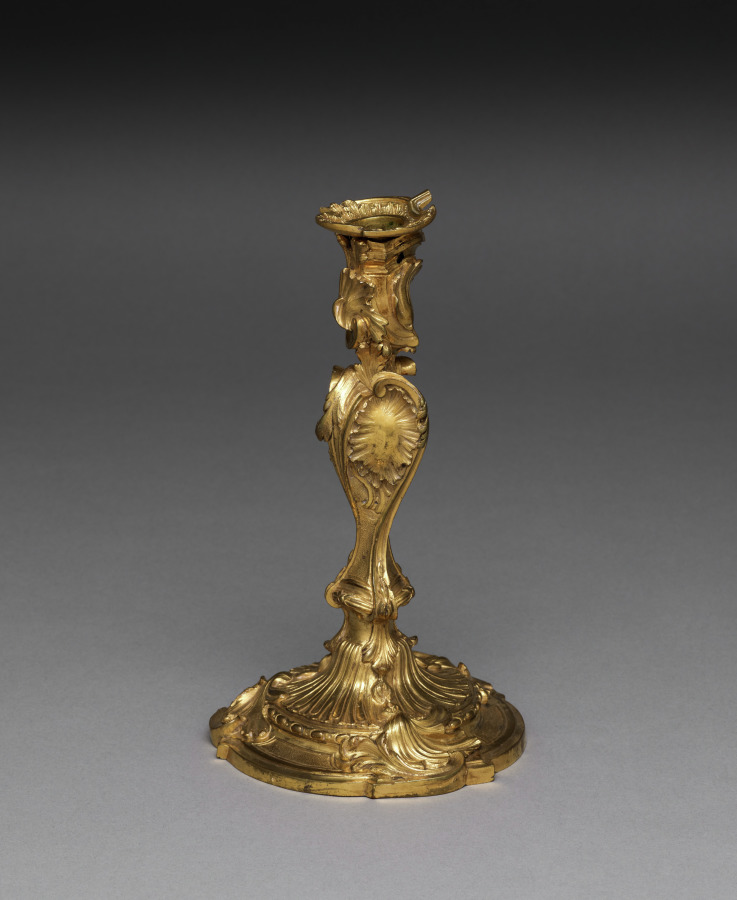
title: Candlestick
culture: France, 18th century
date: 1745–1749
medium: gilt metal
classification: Furniture and woodwork